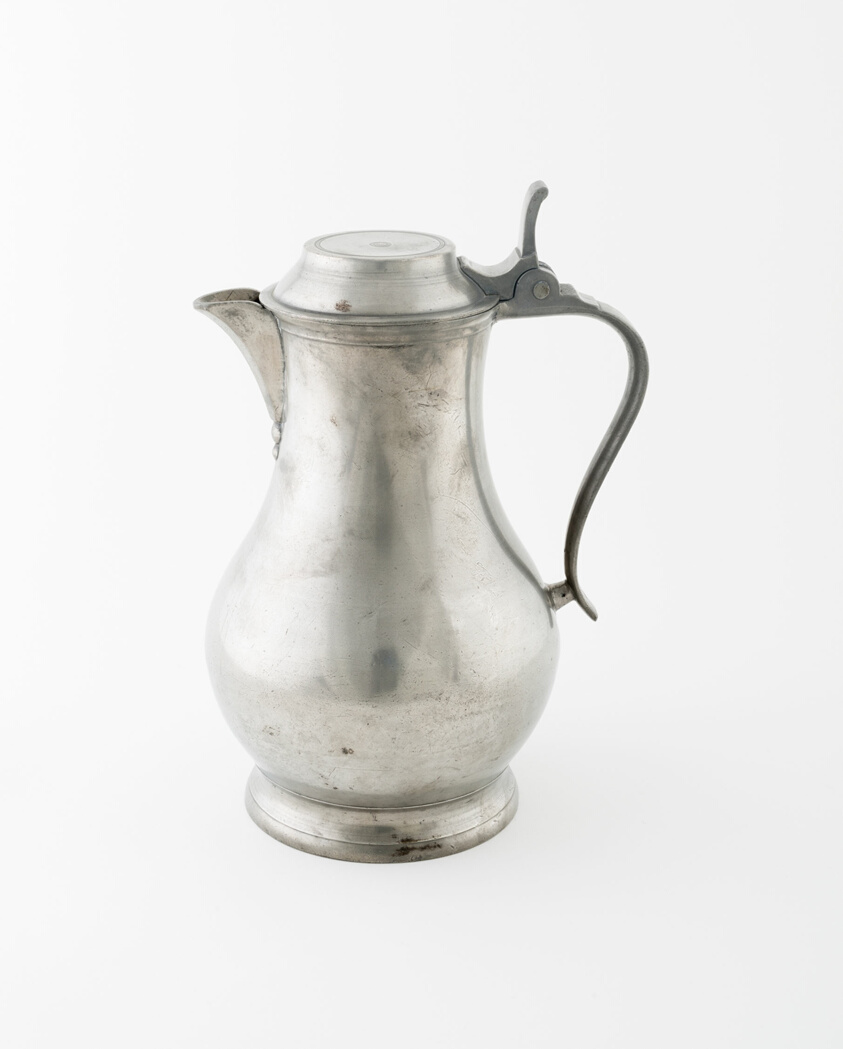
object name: Metalwork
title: Flagon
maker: Caron à Lille; French, active 19th century; Lille, France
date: Mid 19th century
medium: Pewter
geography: Lille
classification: pewter; metalwork; european decorative arts